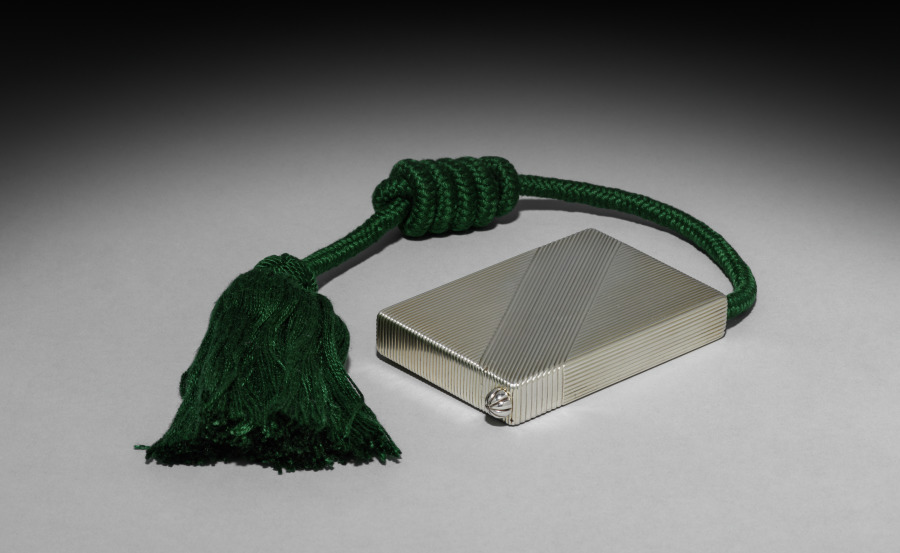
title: Cigarette Case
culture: Russian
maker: House of Fabergé (Russian, 1842–1918)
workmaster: August Hollming (Finnish, 1854–1913)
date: 1911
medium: Silver, ruby, textile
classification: Silver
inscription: Signed with initials of the workmaster August Hollming (active 1880-1913)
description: Fabergé offered variations of a cigarette case model such as this example, using different materials, surface treatments, and ornamentation. Accommodating individual clients’ wishes, the firm would also add a family insignia or additional decoration. The finely ridged surface demonstrates the superb handling of the precious metal by August Hollming, a Finnish master who worked for Fabergé in Saint Petersburg.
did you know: The cigarette case also includes a compartment for a match striker.